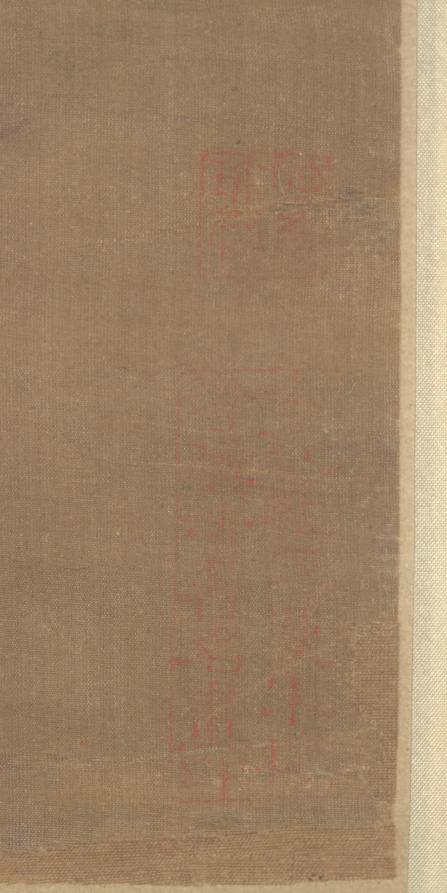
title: Landscape in the Style of Dong Yuan and Juran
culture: China, Qing dynasty (1644-1911)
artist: Gong Xian (Chinese, 1599–1689)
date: c. 1650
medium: hanging scroll, ink with white pigment on silk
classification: Painting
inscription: 畫家董巨，實開南宗。既無剛根之氣，復無刻畫之跡。後之作者或以才見，或以法稱。唯董巨則幾乎道矣。然逞才則離法，泥法則叛道。至道無可道。說者謂即歛才就法之謂道。問之董巨，而董巨不知，忽乎微矣。此幅余二十年前舊作。藏之新安吳氏。吳君晉明寶之若家珍。後携之金陵。命余題識。余因與晉明論畫及此，并紀之。非敢曰此效法董巨而有得焉者也。 庚戌冬杪半畝居人龔賢。 [印]龔半千; 野遺賢; [左下]龔賢; [上]可能另有龔賢一印。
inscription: 2 additional seals of Cheng Qi 程琦 (1911–1988)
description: Towering peaks and unfolding ranges are piled up and overlaid with layer after layer of brushwork to give an overall dense, dark, and even melancholic effect. Gong Xian created a personal style of landscape, which departed greatly from his models Dong Yuan and Juran. The tension between tradition and individuality had been a topic of interest for the Chinese artist. As Gong Xian writes in his inscription: "Painters of later periods may be known for their natural talents or praised for their observance of established traditions. . . . However, those who indulge in showing off their talent will deviate from the tradition, while those who adhere to tradition will alienate themselves from the Dao. The supreme Dao is inexplicable in words. . . ."